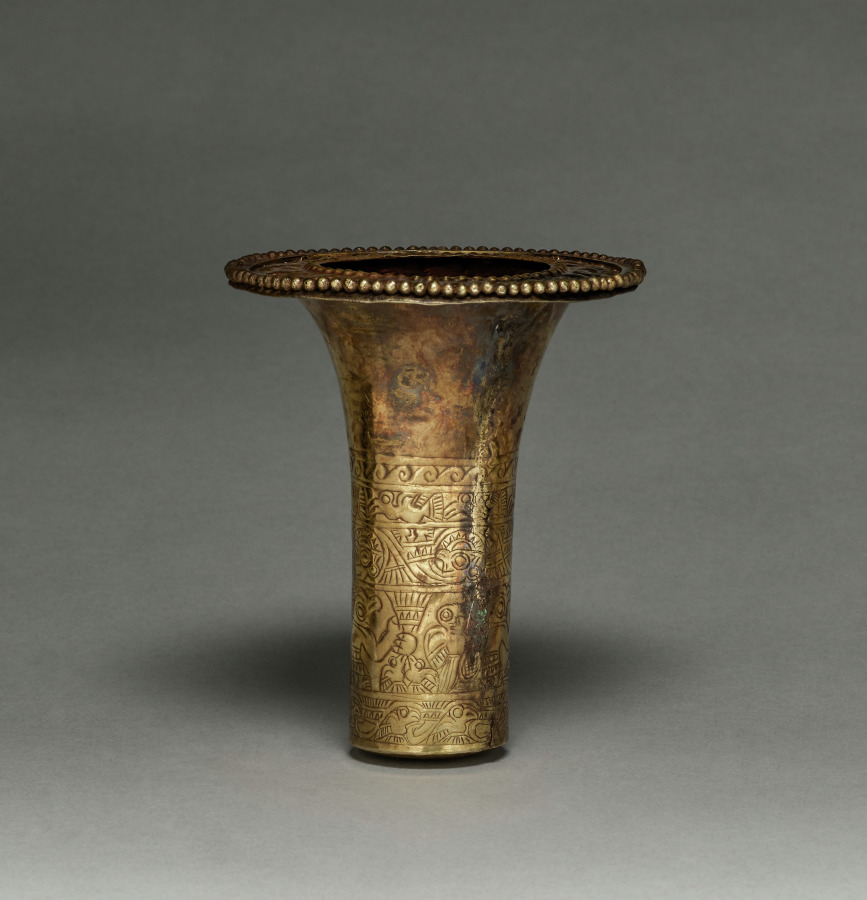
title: Ear Flare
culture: Peru, North Coast, Chimú style (900-1470)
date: 900–1470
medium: hammered gold alloy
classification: Metalwork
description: North Coast ear ornaments typically have a long shaft that balanced the weight of the glorious frontal. This pair illustrates Chimú interest in the sea, which had great economic and religious importance. On the shafts are bands of seabirds and waves, and a similar pattern edges the frontals, which were altered in modern times. Originally solid disks, the frontals' centers were cut out and a dotted band was added to the rim.